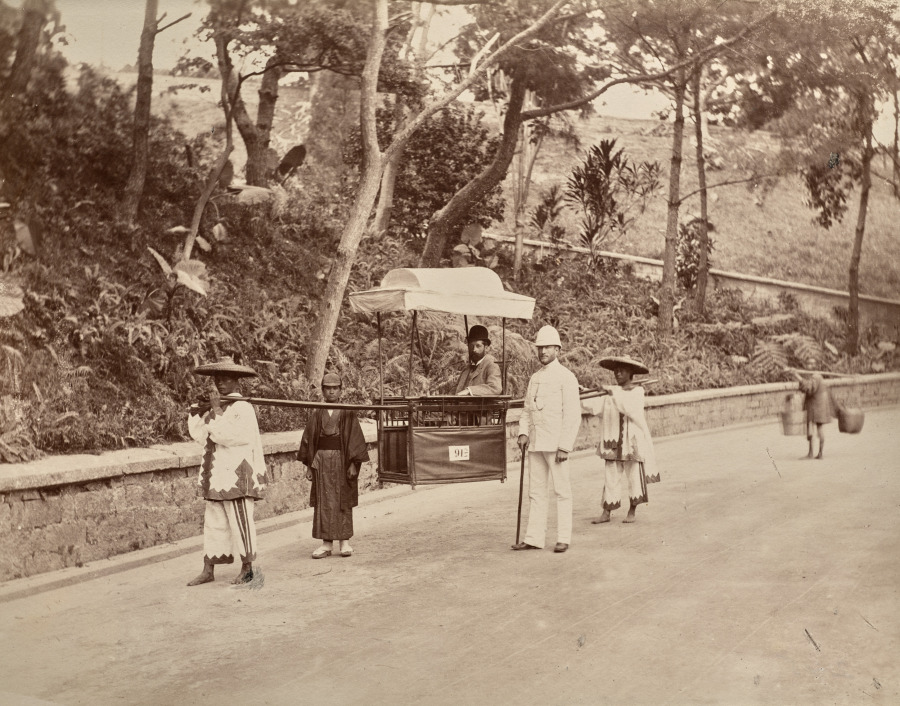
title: Untitled (man being carried in sedan chair, verso)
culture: England, 19th century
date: c. 1880s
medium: gelatin silver print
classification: Photograph